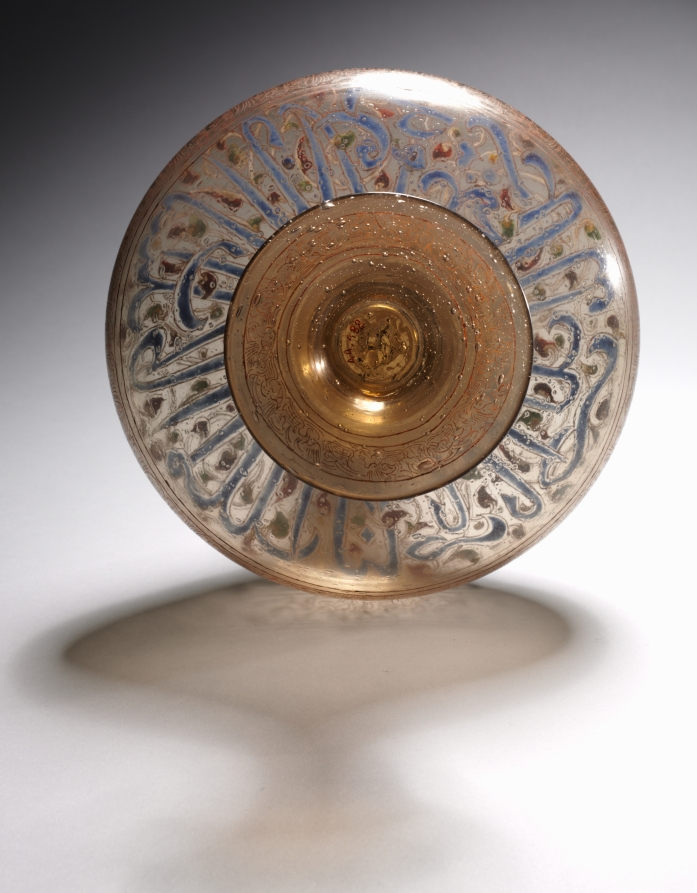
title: Bottle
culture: Europe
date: c. 1900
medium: glass with enameled and gilded decoration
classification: Glass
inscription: The inscription translates: "Glory to our lord, the sultan, the king, the victorious, the protector of the world and the religion, Muhammed."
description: The bold inscription on the body of the bottle translates: “Glory to our lord, the sultan, the king, the victorious, the protector of the world and the religion, Muhammad.” The sultan referred to here is the Mamluk ruler Muhammad ibn Qala’un (1285–1341), who is also referenced on the nearby mosque lamp. This bottle, as with the mosque lamp CMA 1981.10, is representative of reproductions of Mamluk glass that were prominent in the late 1800s in Europe during a period of resurgence of interest in Islamic art. At this time, collectors and artists revived the techniques of enameling and gilding that are hallmarks of Mamluk glass.